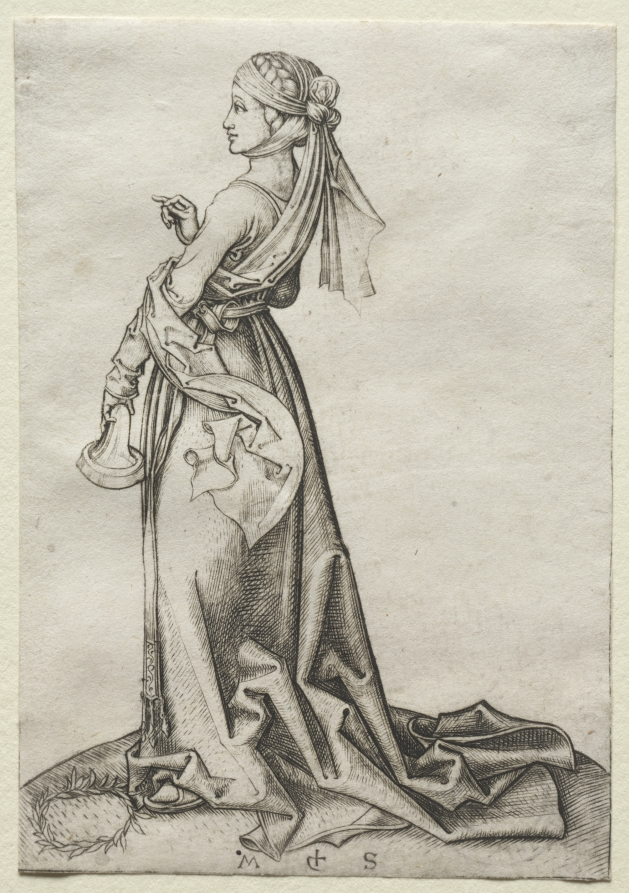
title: The First of the Foolish Virgins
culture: Germany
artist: Martin Schongauer (German, c. 1450–1491)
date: 1469–79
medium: engraving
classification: Print